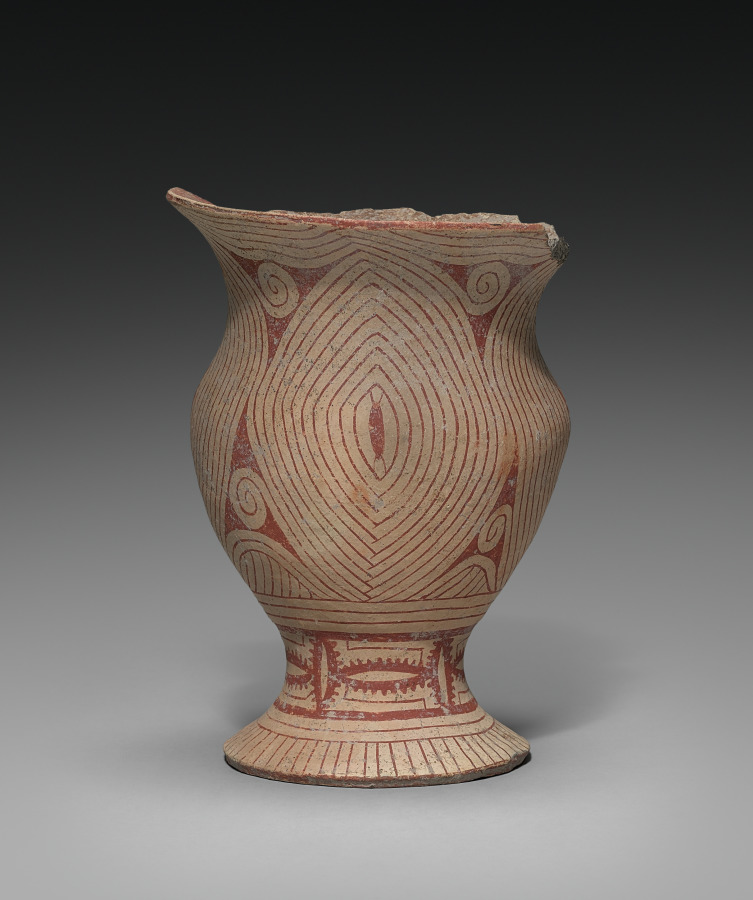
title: Jar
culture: Thailand, Ban Chiang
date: 300 BCE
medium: earthenware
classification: Ceramic